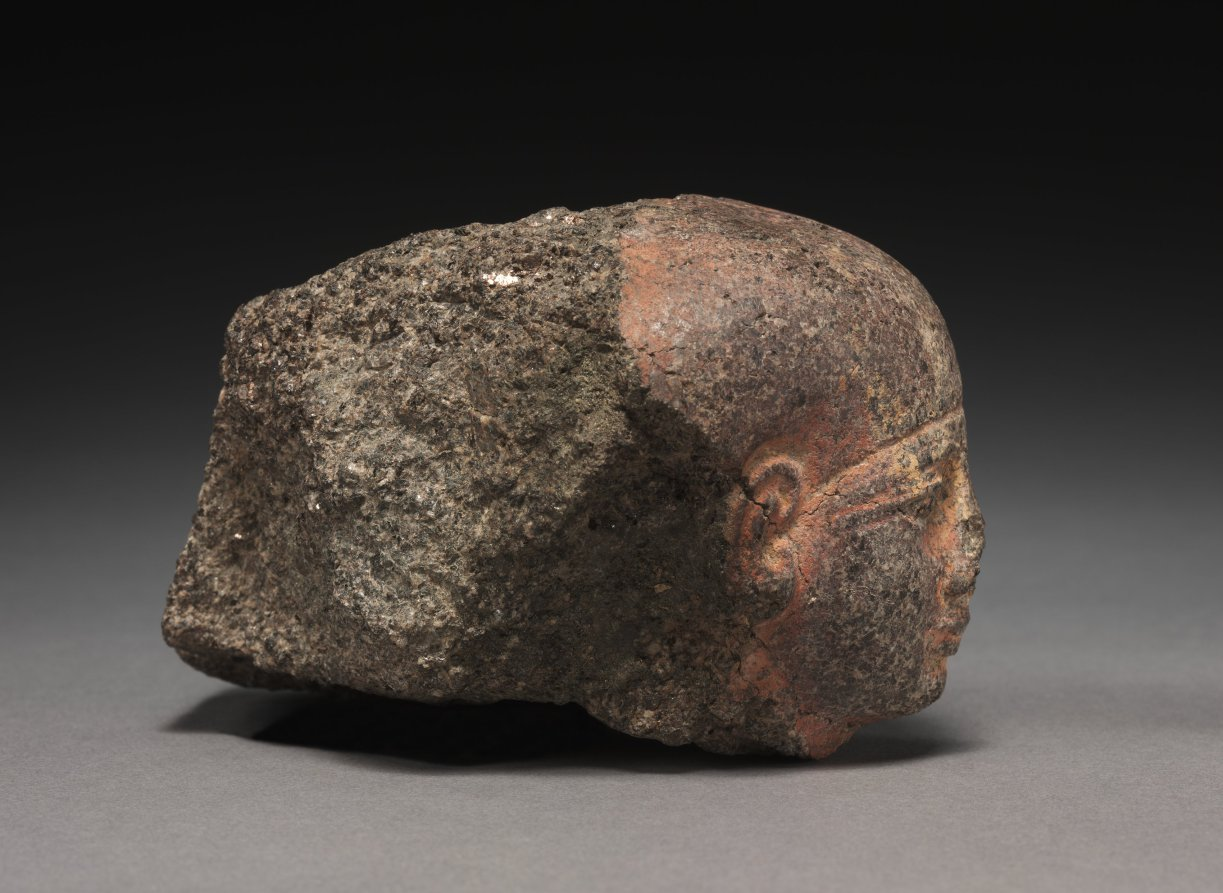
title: Male Head, perhaps from a Pair Statue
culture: Egypt, New Kingdom (1540–1069 BCE), Dynasty 18, reign of Amenhotep II (1425–1400 BCE)–reign of Tuthmosis IV (1400–1390 BCE)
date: 1401–1391 BCE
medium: gray granite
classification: Sculpture